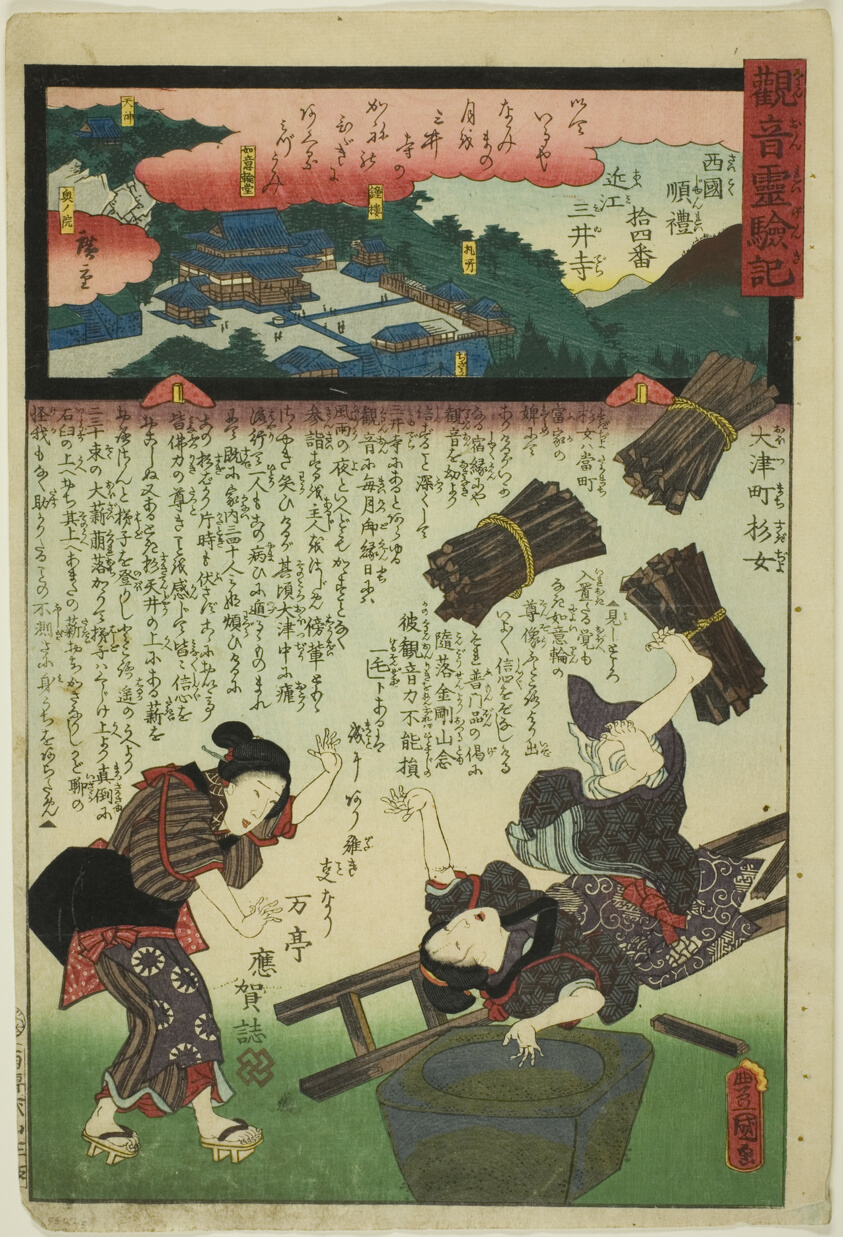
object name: Print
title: Mii Temple in Omi Province, No. 14 on the Saikoku Pilgrimage Route (Saikoku junrei juyonban Omi Miidera), from the series "The Miracles of Kannon (Kannon reigenki)"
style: Japanese (culture or style)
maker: Utagawa Kunisada I (Toyokuni III); Japanese, 1786-1864; Utagawa Hiroshige II (Shigenobu); Japanese, 1826–1869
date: 1859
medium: Color woodblock print; oban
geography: Japan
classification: woodblock print; print; asian art